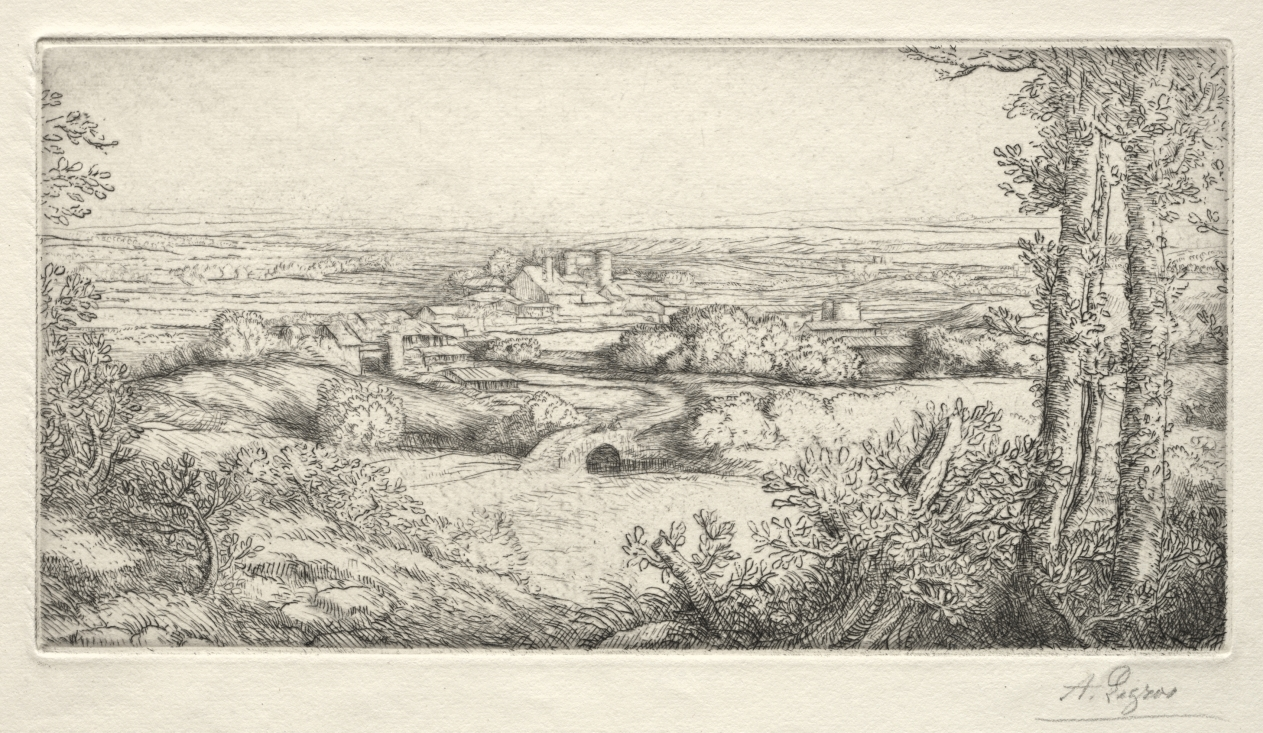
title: A Valley in Burgundy (Une Vallée en Bourgogne)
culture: France, 19th-20th century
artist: Alphonse Legros (French, 1837–1911)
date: c. 1857–1911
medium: etching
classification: Print